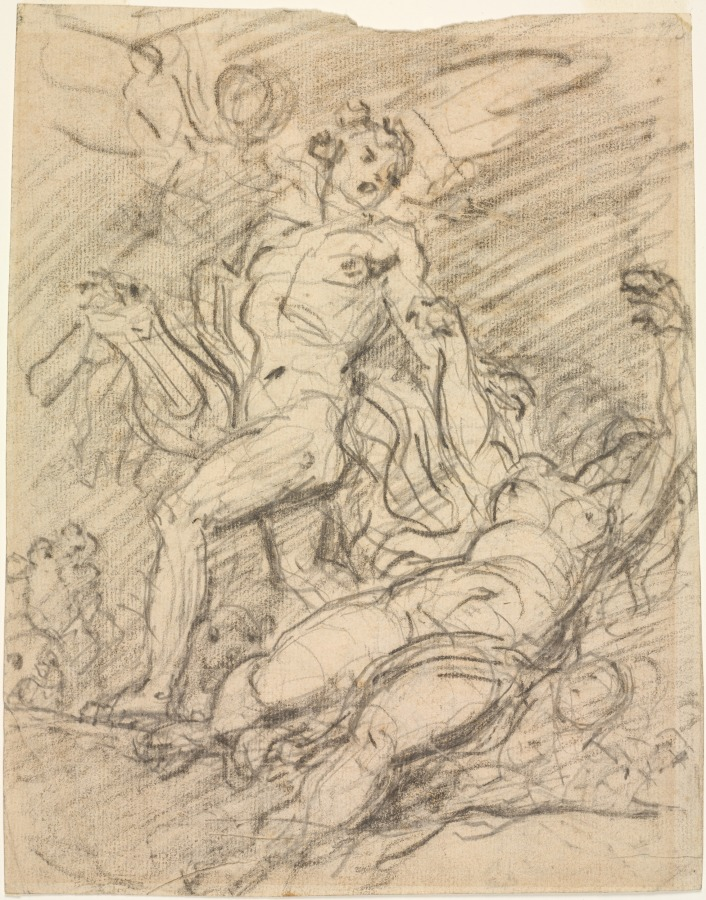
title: Orpheus and Eurydice (recto); Figure Studies (verso)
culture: France, 18th century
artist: Jean-Honoré Fragonard (French, 1732–1806)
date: c. 1761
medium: Black and gray chalks on cream laid paper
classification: Drawing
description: Quick drawings could serve a variety of purposes, and it is not always clear today why an artist created a particular sketch. This one may record a painting Fragonard saw during a journey to Italy, or capture an idea he was considering for a painting of his own. Orpheus, identified by the lute, grasps for his love Eurydice as she is pulled down into Hades. The snarling animals near his feet may represent Cerberus, the multiheaded guard dog of the underworld.